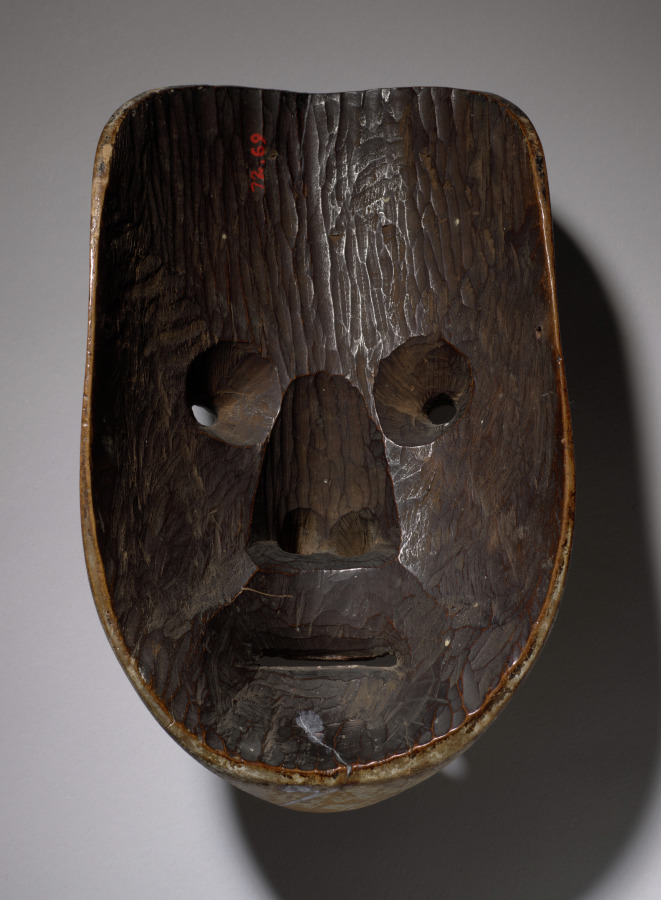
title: Noh Mask: Waka-onna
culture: Japan, Muromachi period (1392–1573)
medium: wood with polychromy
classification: Sculpture